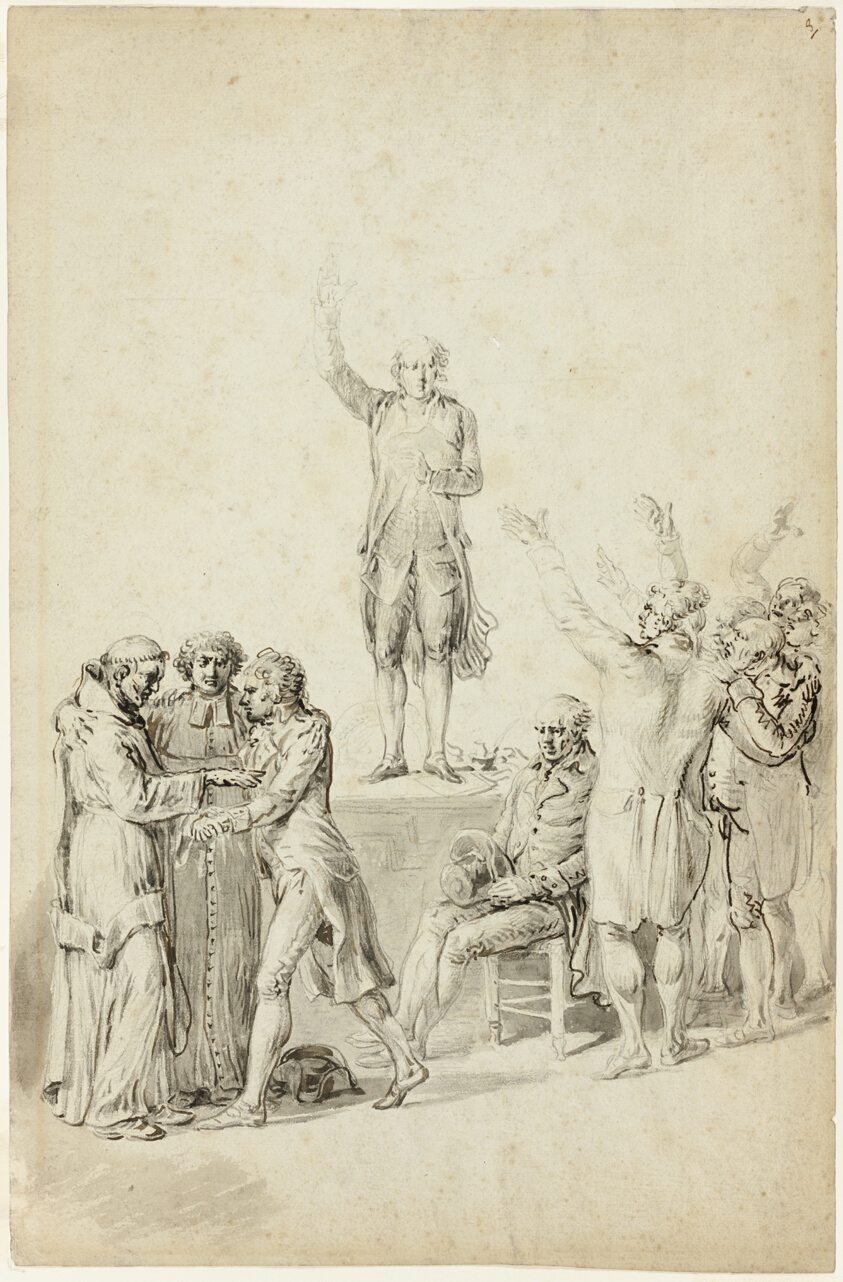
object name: Drawing and Watercolor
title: Study for The Oath of the Tennis Court: Bailly Standing on the Desk, Asking for a Vote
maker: Jean Pierre Norblin De La Gourdaine (French, 1745-1830); after Jacques-Louis David (French, 1748-1825)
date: c. 1804-05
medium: Pen and brown ink, black chalk, and brush and gray wash, on gray laid paper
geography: France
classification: ink or chalk wash; drawings (visual works); prints and drawing